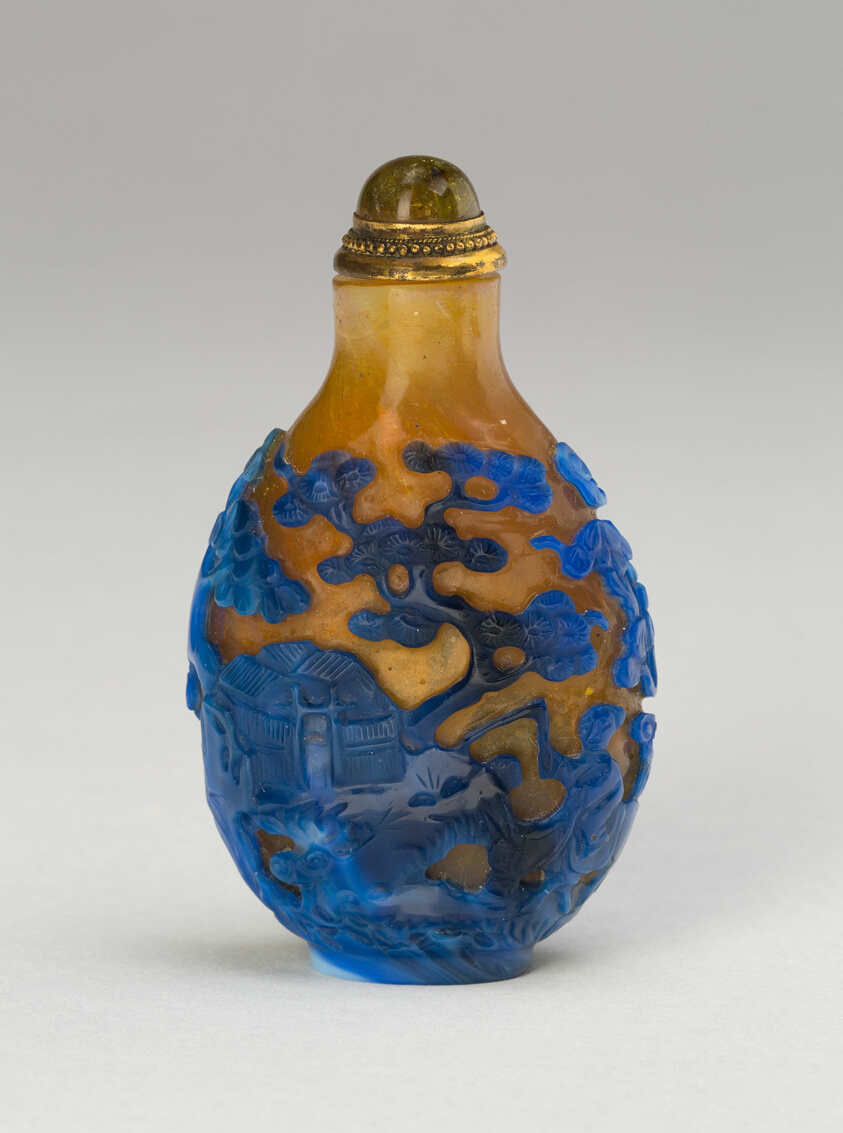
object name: Vessel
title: Snuff Bottle with a Figure on Mule in Landscape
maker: China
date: Qing dynasty (1644–1911), 1760–1820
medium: Glass; lapis-like blue overlay on coffee ground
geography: China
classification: snuff bottle; asian art; vessel